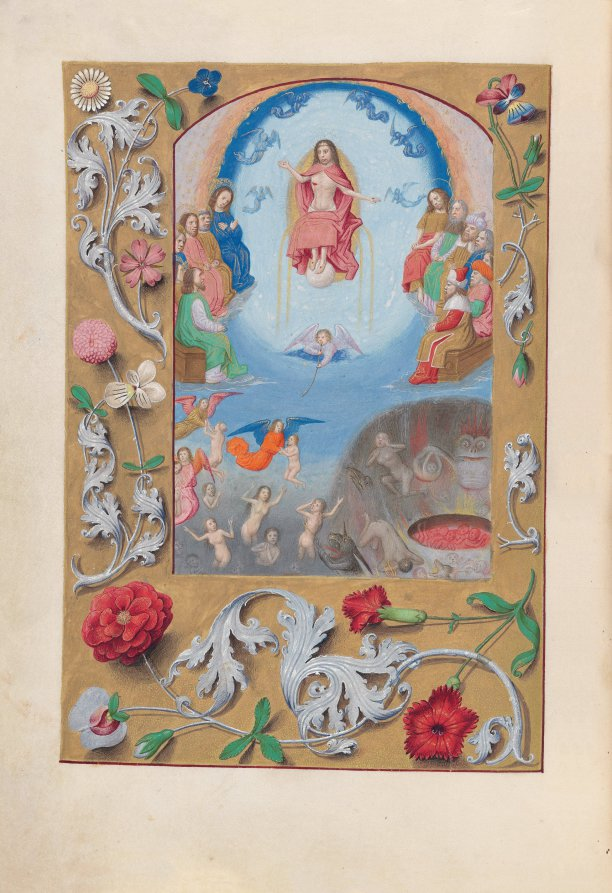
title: Hours of Queen Isabella the Catholic, Queen of Spain: Fol. 199v, Last Judgment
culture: Flanders, Ghent and Bruges, late 15th century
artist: Master of the First Prayerbook of Maximillian (Flemish, c. 1444–1519)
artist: and Associates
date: c. 1500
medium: ink, tempera, and gold on vellum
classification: Bound Volume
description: This manuscript was illuminated by a circle of at least five highly organized manuscript painters active in the Flemish cities of Ghent and Bruges. The principal illuminator was Alexander Bening, who painted the majority of the book's miniatures. Manuscripts produced by this circle of artists are renowned for the decoration of their borders, which typically feature a rich variety of realistically-painted flowers, birds, and butterflies. This prayer book, called a book of hours, was intended not for a cleric, but for the private devotions of a lay person-in this case, Isabella the Catholic, Queen of Spain (1451-1504). Isabella's coat of arms embellishes the book's frontispiece. It is unlikely that the book was commissioned by the Queen herself; rather, she probably received it as a diplomatic gift from someone courting her patronage, perhaps Cardinal Francisco Jimenez de Cisneros. A Franciscan friar, Jimenez was dependent upon Isabella for his advancement, first to the post of Queen's confessor in 1492, and then to Archbishop of Toledo in 1495.